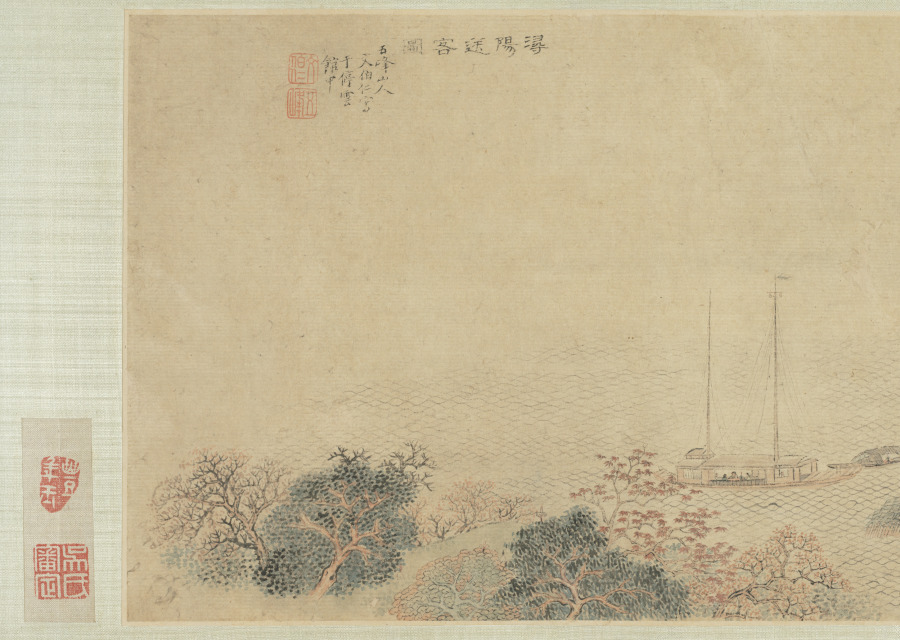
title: Saying Farewell at Xunyang (Song of the Pipa)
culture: China, Ming dynasty (1368–1644)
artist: Wen Boren (Chinese, 1502–1575)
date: 1500s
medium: handscroll, ink and color on paper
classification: Painting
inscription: "潯陽送客圖" 五峰山人文伯仁寫于停雲館中 [印] 文伯仁; 五峰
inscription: 2 colophons and 9 additional seals: 1 transcription of "Pipa xing 琵琶行” (Song of Pipa) and 3 seals of Zhu Yizun 朱彜尊 (1629-1709); 2 seals of Wu Rongguang 吳榮光 (1773-1843); 1 colophon, dated 1826, and 3 seals of Wu Xijia 吳錫嘉 (mid-1700s)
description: This handscroll depicts The Song of the Pipa, a poem by Bai Juyi 白居易 (772–846) written after the poet’s encounter with a pipa player on the Yangzi River. Expelled from her home city when her beauty and fame had faded, she played for the poet at night. Her musical performance and tragic life story resonated with Bai Juyi, who had just been demoted and exiled from life at court himself. The hazy, vast view and pale color tonalities of this painting illustrate these feelings of endless sadness, having lost one’s sense of purpose in life.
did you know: Wen Boren depicted the chilly autumn water with a fishnet pattern.